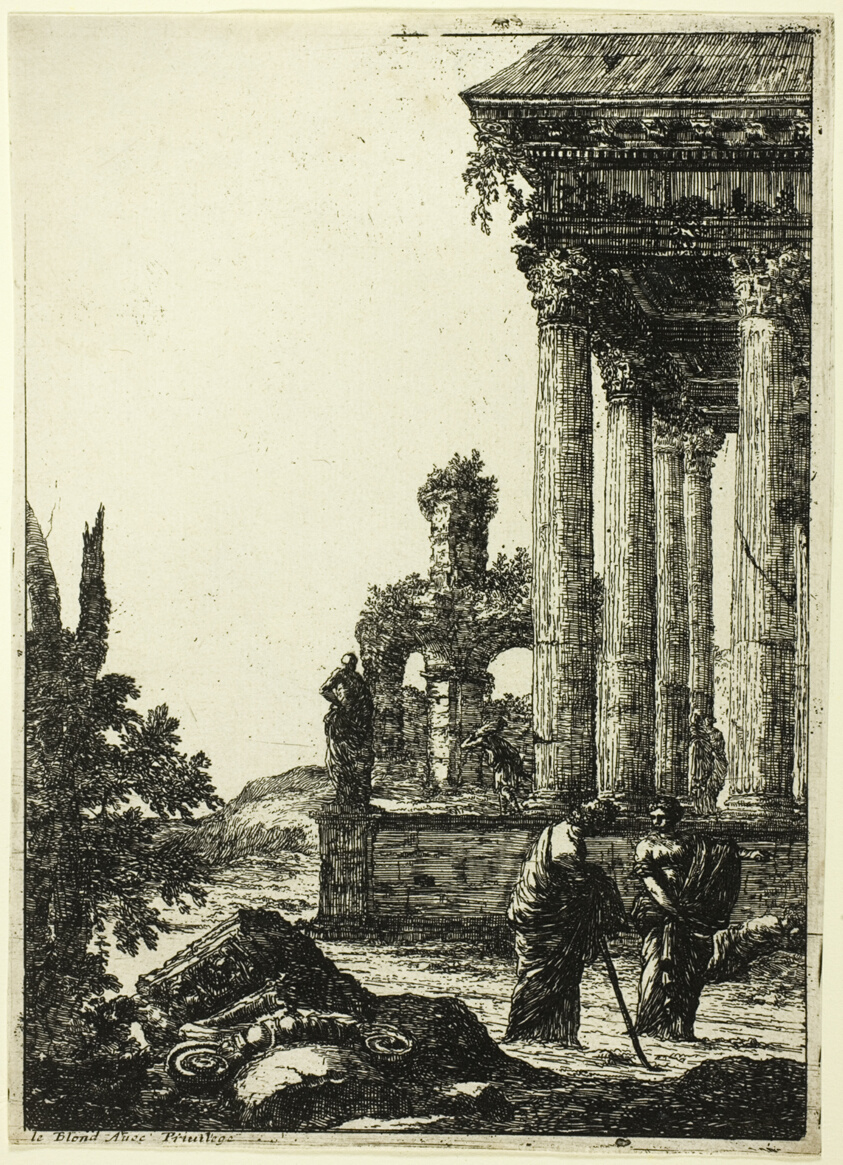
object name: Print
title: A Young Woman Giving Directions to a Person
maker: Jean Le Pautre (French, 1618-1682)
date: c. 1644-1680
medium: Etching on ivory laid paper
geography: France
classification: etching; print; prints and drawing